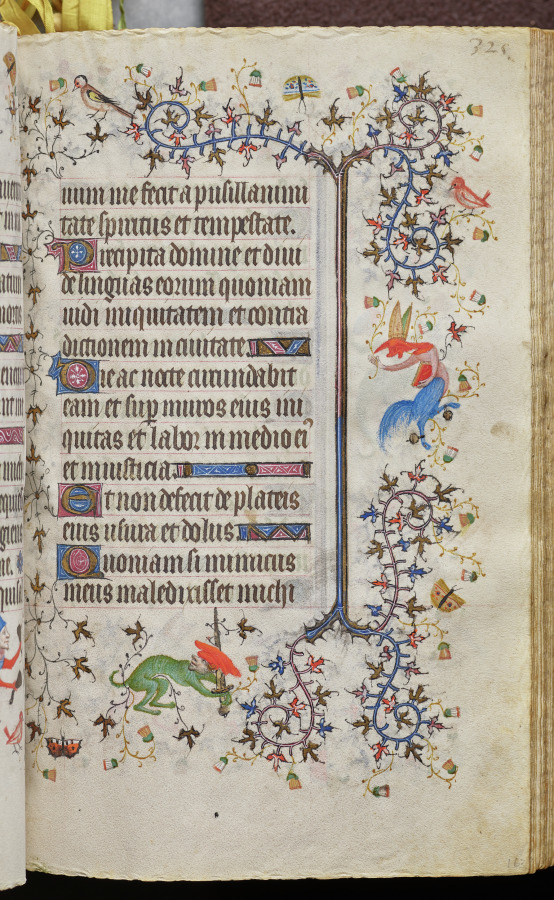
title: Hours of Charles the Noble, King of Navarre (1361-1425): fol. 163a, Text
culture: France, Paris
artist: Master of the Brussels Initials and Associates (French)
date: c. 1405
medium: ink, tempera, and gold on vellum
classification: Bound Volume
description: This precious volume was obviously highly prized by its owner, the French-born King of Navarre, who had his coat of arms painted on no less than twenty folios. Rather than directly commissioning this manuscript from a specific workshop, it seems that Charles the Noble acquired his book of hours -- perhaps ready-made for the luxury market -- while on a trip to Paris in 1404-05. A collaborative effort, six painting styles are evidenced within the pages of this codex, those of two Italians, two Frenchmen, and two Netherlanders. The painter who was responsible for the planning and decoration of the book, and who produced seventeen of the large miniatures, was a Bolognese artist known as the Master of the Brussels Initials. His principal assistant, responsible for most of the borders, was a Florentine who signed his name "Zecho" da Firenze on folio 208 verso.